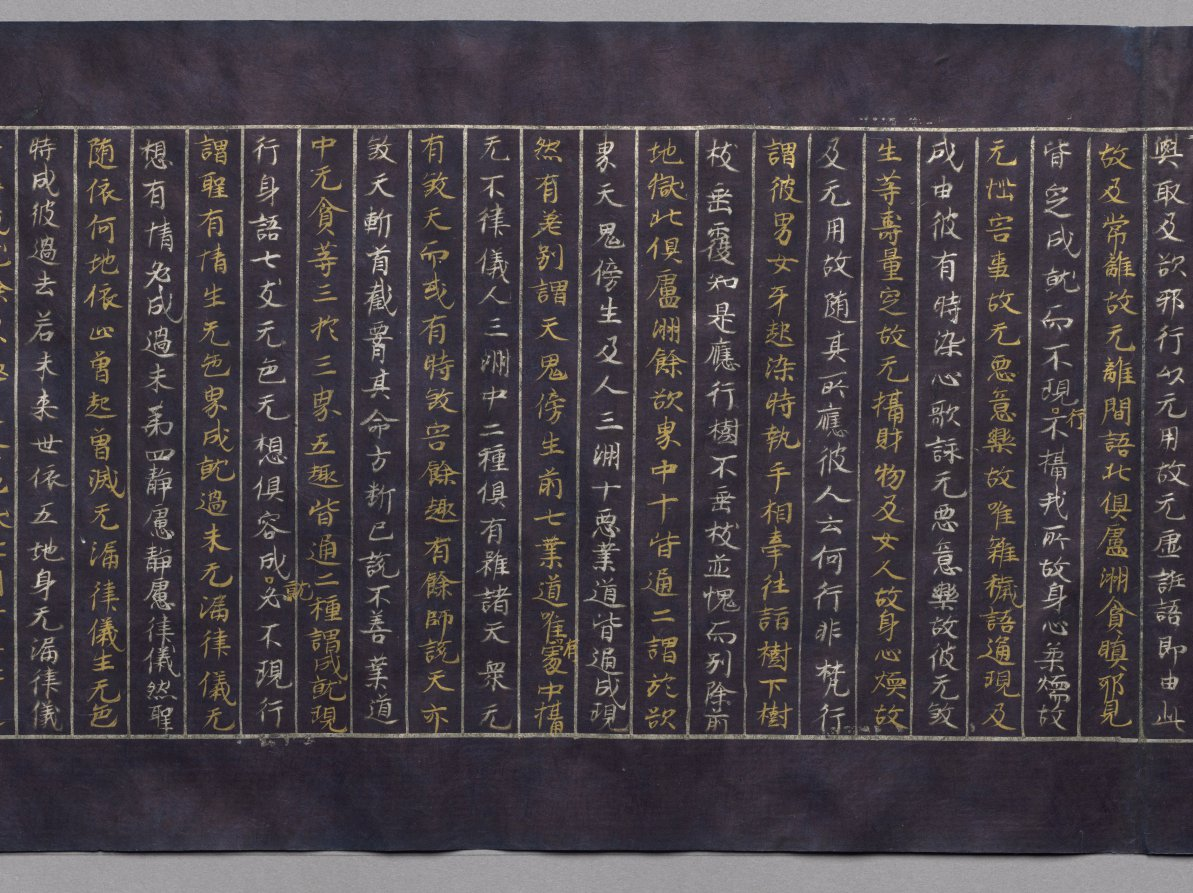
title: Meta-Discourse on the Teachings from the Treasury (Abidharmakosha-Bhashya)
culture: Japan, Heian period (794–1185)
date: 1100s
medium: handscroll; gold and silver on indigo-dyed paper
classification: Manuscript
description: This religious text relates some of the teachings of the great fourth-century Indian Buddhist scholar Vasubhandhu. The text analyzes human consciousness in its relationship to the environment and transformations that occur during meditation. This scroll is the 17th part of a 30-part translation of the text by Xuanzang, an eminent seventh-century Chinese monk.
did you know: The frontispiece depicts the Buddha Shakyamuni preaching in a paradisical landscape.